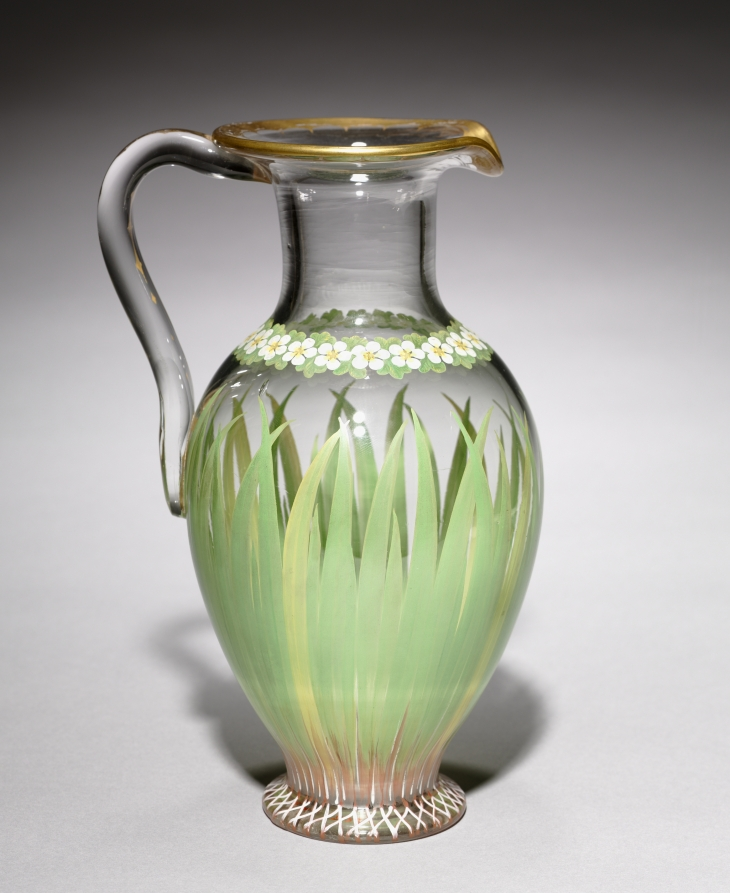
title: Jug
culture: England, 19th century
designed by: Richard Redgrave (British, 1804–1888)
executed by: J. F. Christy, Stangate Glass Works (British)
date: 1847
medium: glass, enamel decoration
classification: Glass